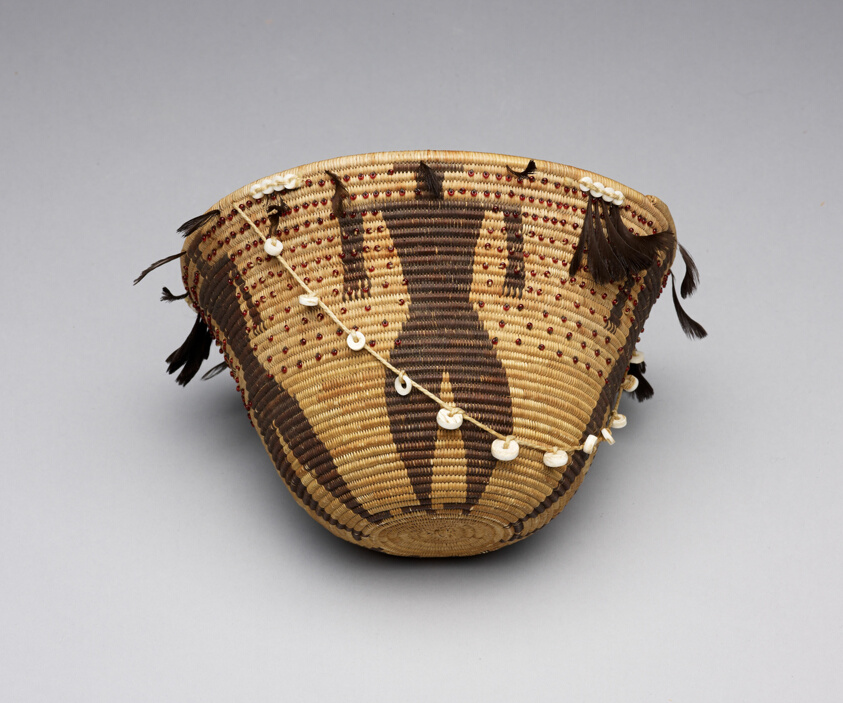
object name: Basketry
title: Figured Gift Basket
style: pomo, native american, northern california, americas, native north american, Arts of the Americas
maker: Pomo (Northern California, United States)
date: c. 1890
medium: Vegetable fibers, glass and clamshell beads, and quail feathers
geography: California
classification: basketry; bead; featherwork; shell; art of the americas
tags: basketry, baskets, figures (representations), abstract figures